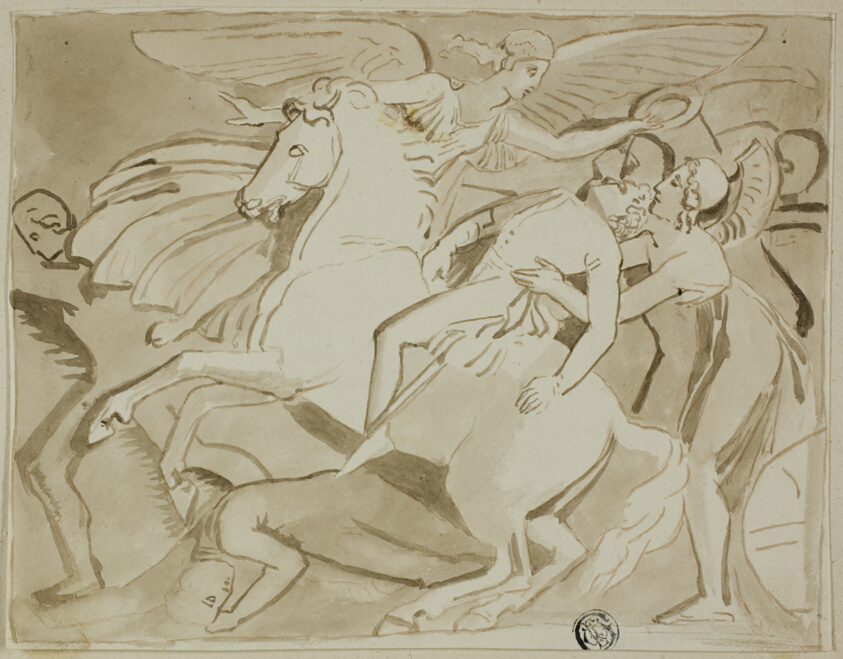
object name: Drawing and Watercolor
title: Angel Placing Wreath on Head of Dying Soldier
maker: After Thomas Stothard (English, 1755-1834); or William Pitts (English, 1790-1840)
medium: Brush and brown wash, with traces of red chalk, on ivory wove paper, tipped on cream wove paper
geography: England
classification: ink or chalk wash; drawings (visual works); prints and drawing